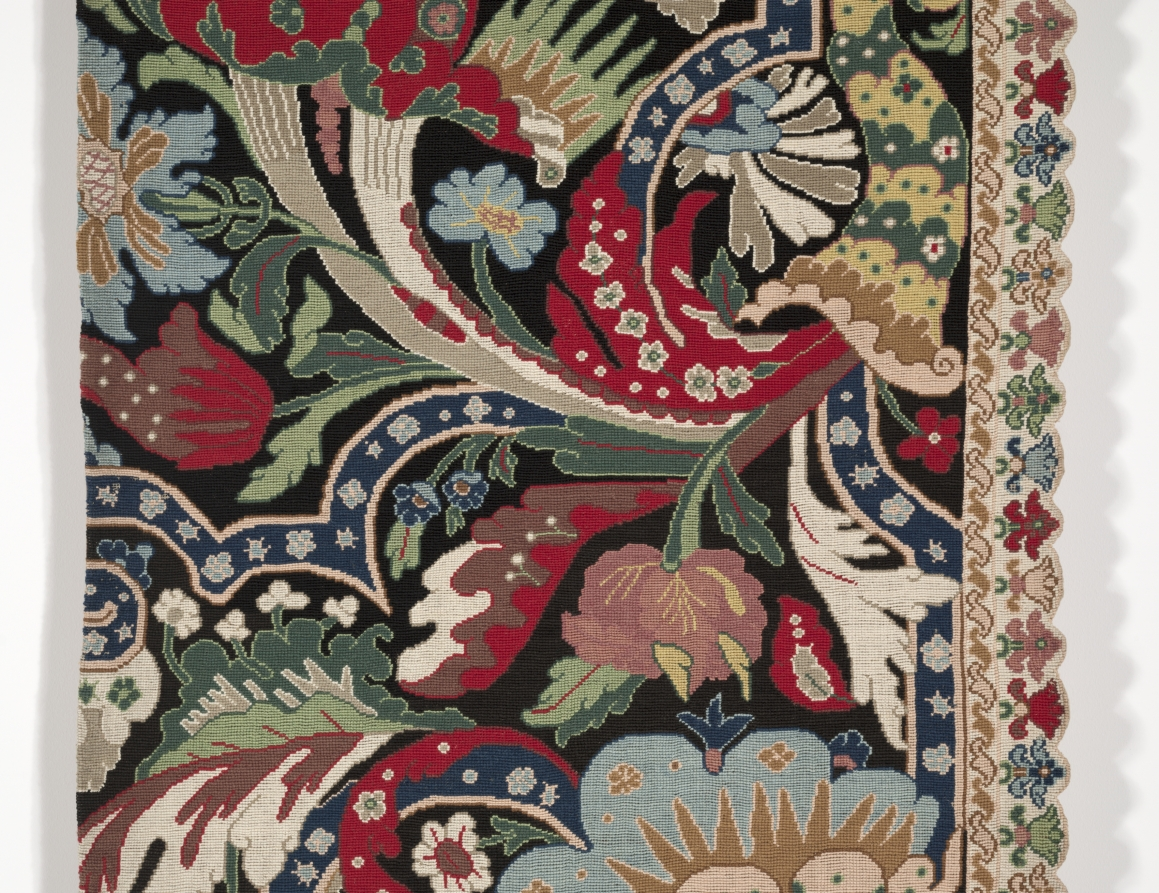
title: Needlework Bed Hanging in the Bizarre style (right half)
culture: France, 18th century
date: 1710–20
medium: needlework, tent and cross stitch embroidery on canvas; silk, wool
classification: Embroidery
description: This panel is one of a pair that would have hung originally around a bed post as part of a full set of hangings on a bedstead in the early 1700's. Elaborate textile hangings were a conspicuous display of wealth since many ladies received their friends within their bedchamber. A full set enveloped the entire bedstead and, when closed, helped retain warmth long after the fire had gone out. This particular pair of panels is remarkable in that they represent many hours of highly skilled needlework. Their design is known as a "bizarre" pattern, which mimicked woven silks of the same era that were asymmetrical, boldly stylized adaptations of Asian fabrics that were coming into the European market from the trading routes at the time.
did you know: The design of this needlework panel is known as a "bizarre" pattern.